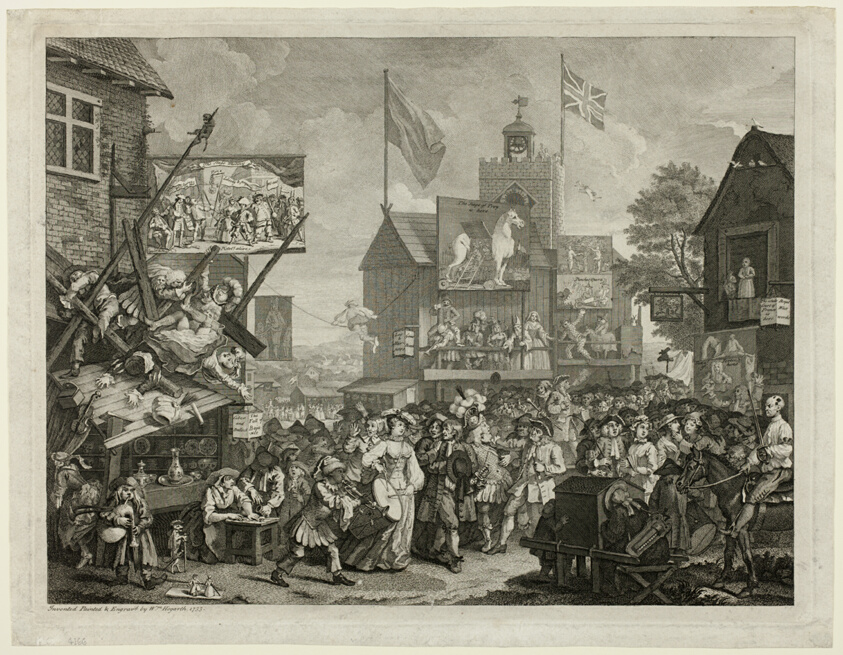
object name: Print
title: Southwark Fair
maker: William Hogarth (English, 1697-1764)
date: 1733/34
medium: Engraving in black on ivory laid paper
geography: England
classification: engraving; print; prints and drawing